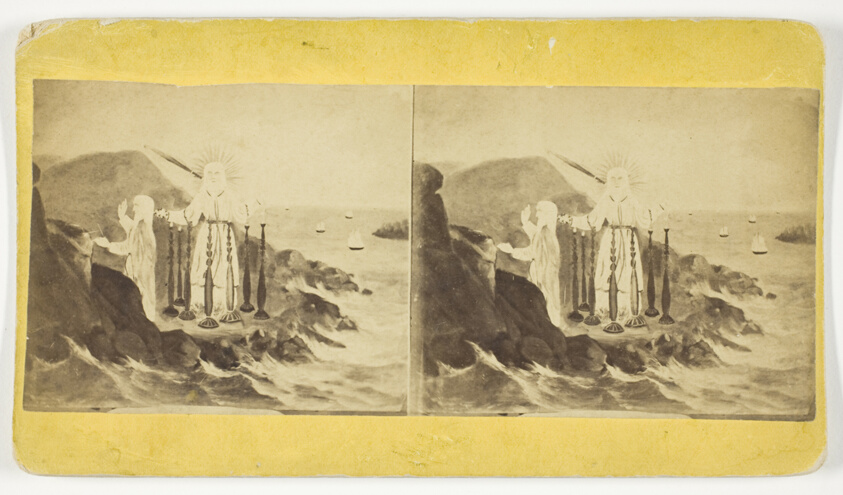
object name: Photograph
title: Untitled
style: 19th century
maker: Artist unknown; American, late 19th century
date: 1875/99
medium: Albumen print, stereo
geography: United States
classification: photography; photograph